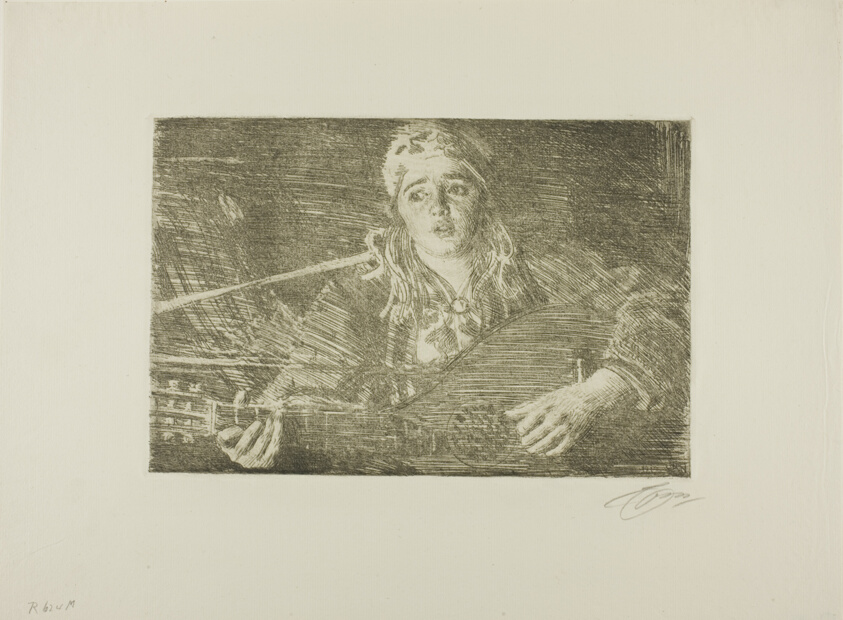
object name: Print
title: Ols Maria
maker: Anders Zorn (Swedish, 1860-1920)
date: 1919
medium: Etching on ivory laid paper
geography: Sweden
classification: etching; print; prints and drawing